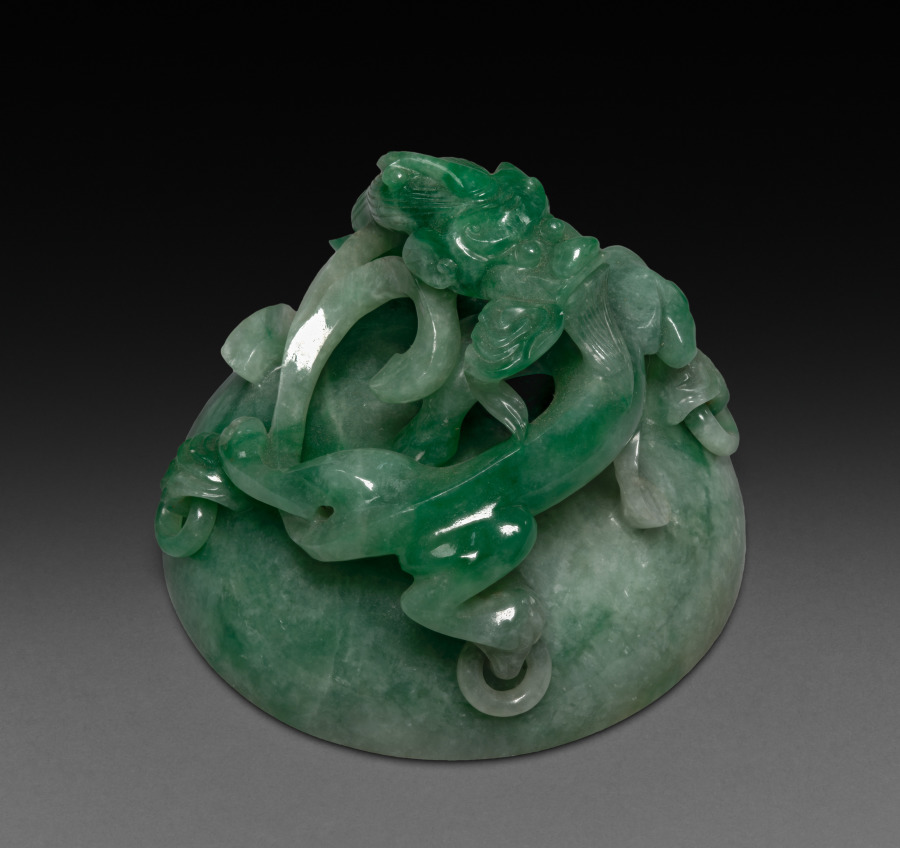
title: Three-Sectional Altar Group: Small Bowl with Carved Dragon (lid)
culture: China, Qing dynasty (1644-1911)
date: 1644–1911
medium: jade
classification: Jade